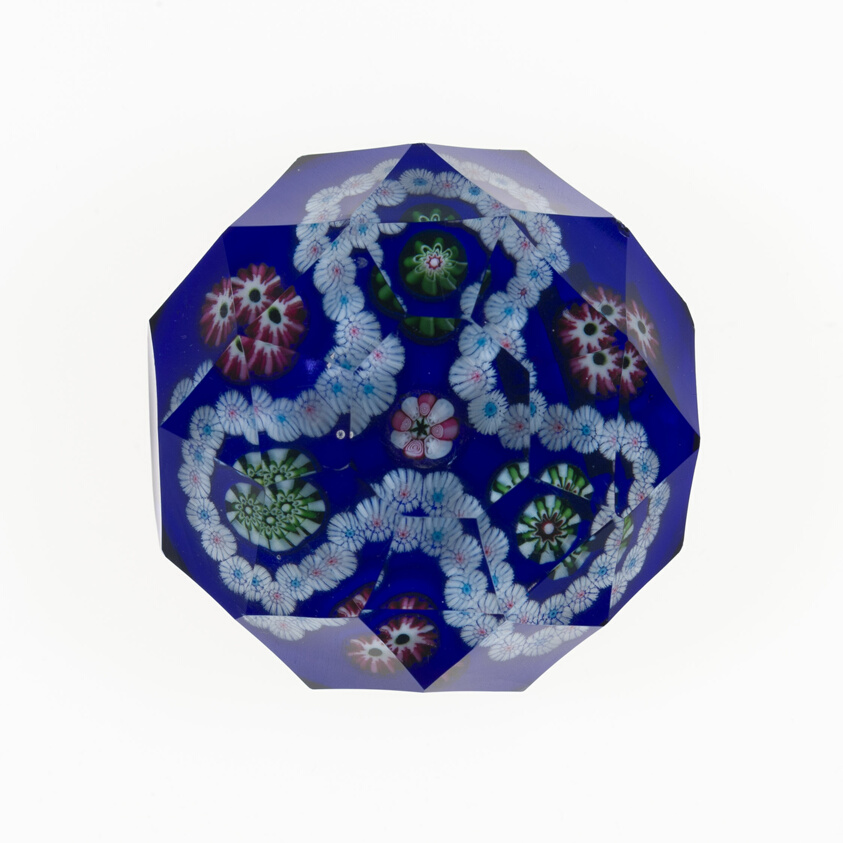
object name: Glass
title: Paperweight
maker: Clichy Glassworks (Cristalleries de Clichy); Clichy, France, 1837-1885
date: c. 1845/60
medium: Glass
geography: France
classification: paperweight; glass